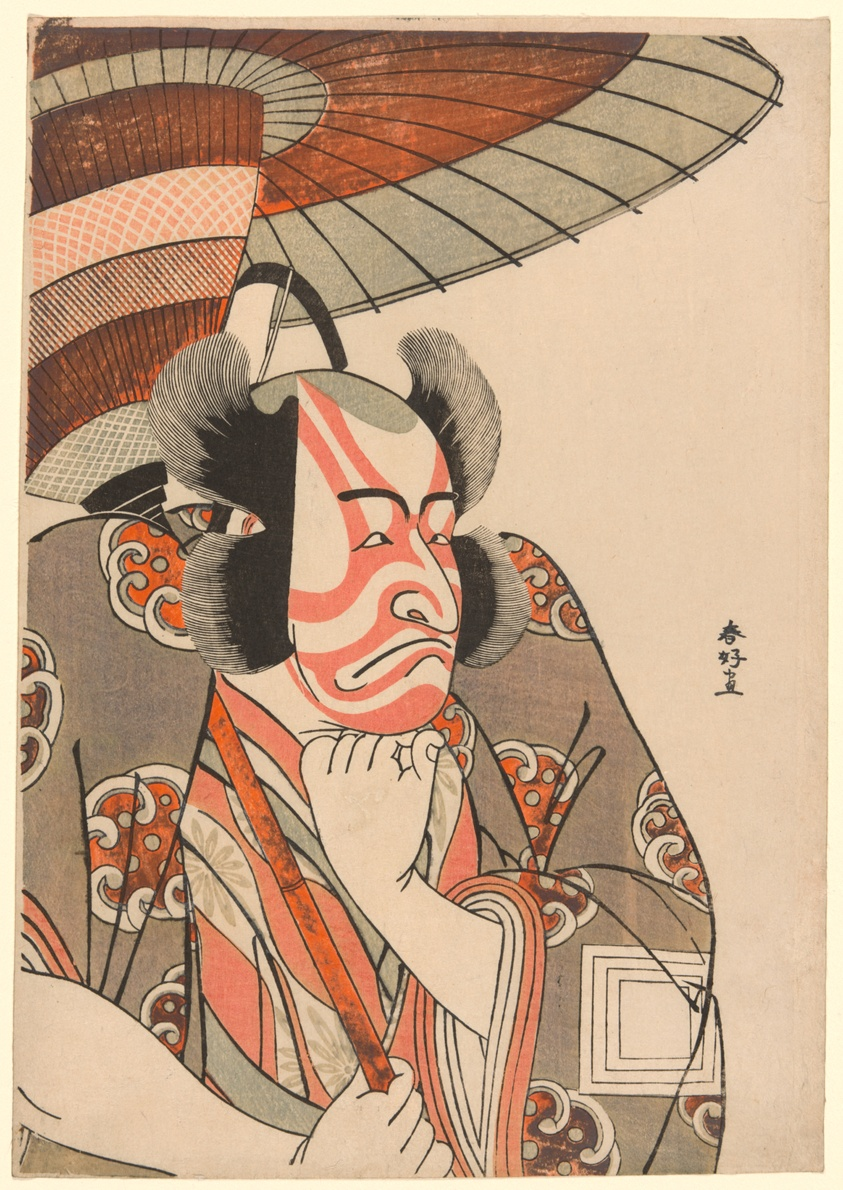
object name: Print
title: Half-Length Portrait of the Actor Ichikawa Danjuro V as Kazusa no Gorobei Tadamitsu in Act Three of the play Kitekaeru Nishiki no Wakayaka (Returning Home in Splendor), Performed at the Nakamura Theater from the First Day of the Eleventh Month, 1780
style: Japanese (culture or style)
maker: Katsukawa Shunko I; Japanese, 1743-1812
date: c. 1780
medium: Color woodblock print; aiban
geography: Japan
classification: woodblock print; print; asian art